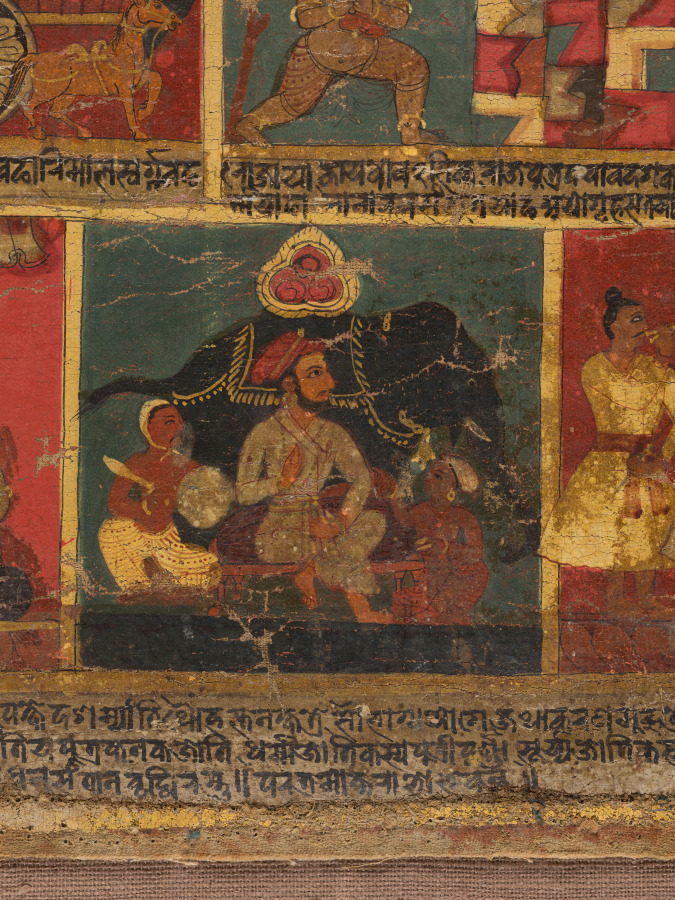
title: Bejeweled Buddha Preaching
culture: Nepal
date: 1648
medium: Gum tempera, ink, and gold on cloth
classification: Painting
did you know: Nepalese devotional paintings on cloth are called "paubha" in the Newari language.